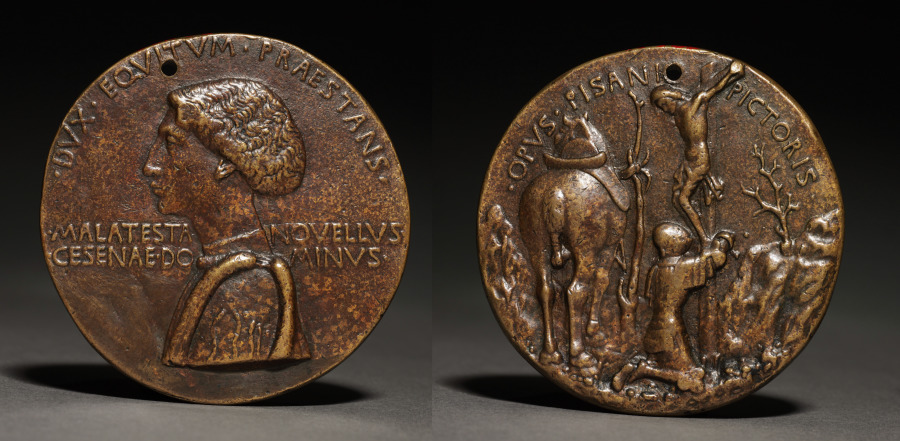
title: Portrait Medal of Domenico Novello Malatesta (obverse) Portrait Medal of Domenico Novello Malatesta (reverse)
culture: Italy, 15th century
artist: Pisanello (Italian, Ferrara, c. 1395–1455)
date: c. 1445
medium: bronze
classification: Sculpture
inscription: obverse: DVX EQVITVM PRAESTANS; across: MALATESTA NOVELLVS CESNAE DOMINVS.